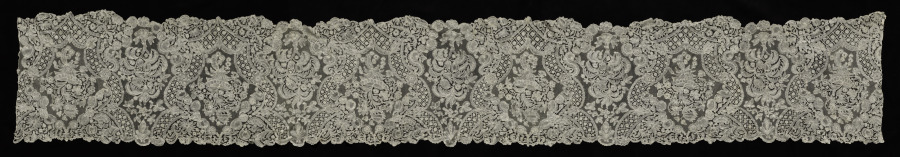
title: Lace Flounce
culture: Belgium, Brabant(?)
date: 1740–60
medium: Linen: bobbin lace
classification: Lace